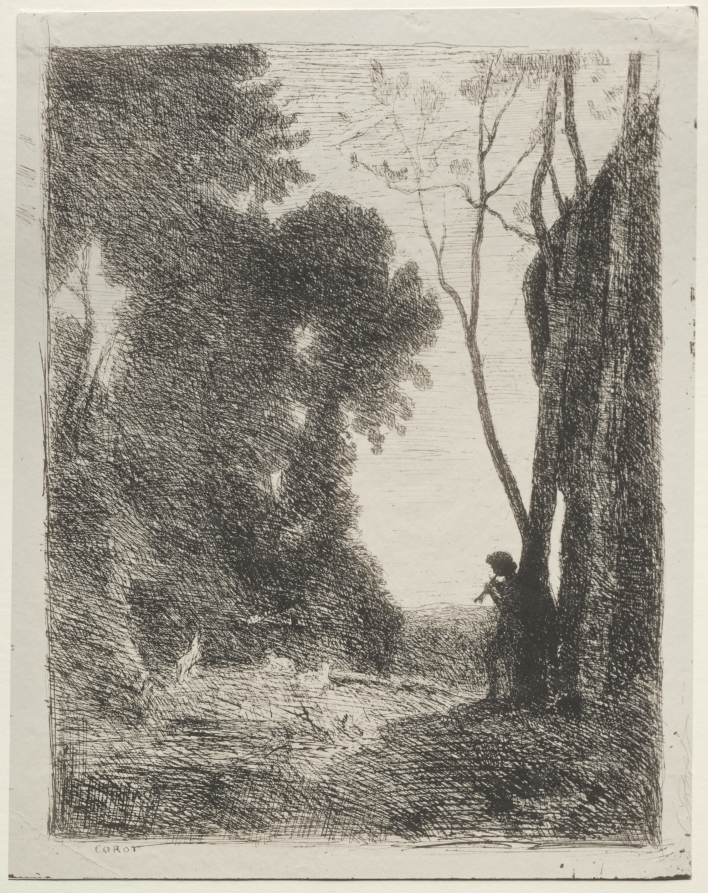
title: The Little Shepherd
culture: France, 19th century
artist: Jean Baptiste Camille Corot (French, 1796–1875)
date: original impression 1855, printed in 1921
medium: cliché-verre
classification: Print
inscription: signed, lower left: "COROT" in glass plate